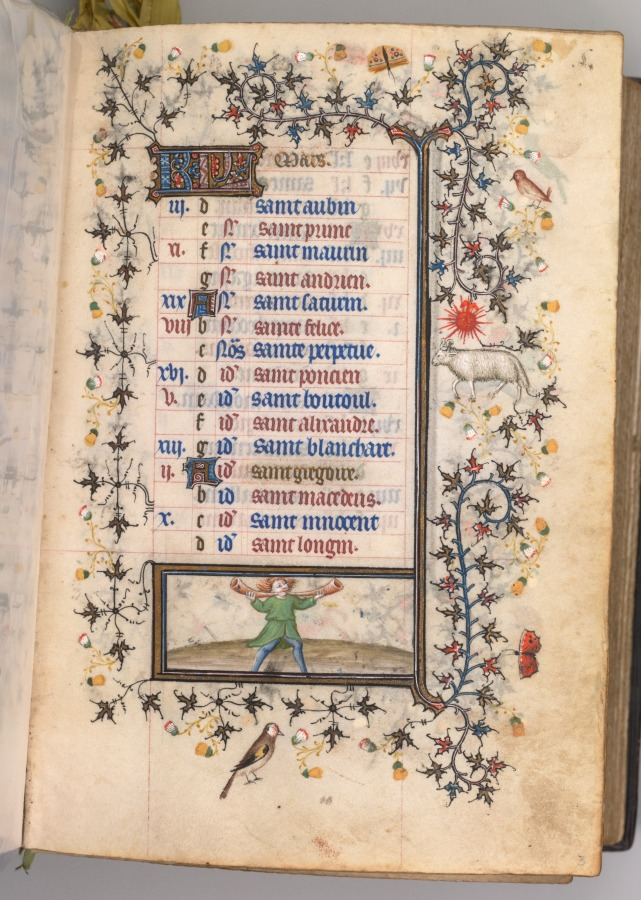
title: Hours of Charles the Noble, King of Navarre (1361-1425): fol. 3r, March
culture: France, Paris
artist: Master of the Brussels Initials and Associates (French)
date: c. 1405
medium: ink, tempera, and gold on vellum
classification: Bound Volume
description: This precious book was highly prized by its owner, Charles III, King of Navarre, a French-born prince whose coat of arms is painted on 20 folios. Charles visited Paris on numerous occasions and likely acquired this volume there in 1404. Paris was the center of the European book trade at the time and attracted illuminators from many parts of Europe. This manuscript represents one of the most remarkable fusions of French and Italian taste in book illumination. Though conforming to Parisian standards, most of the book’s major miniatures are the work of the Brussels Initials Master, an Italian illuminator who previously worked in Bologna and Padua.